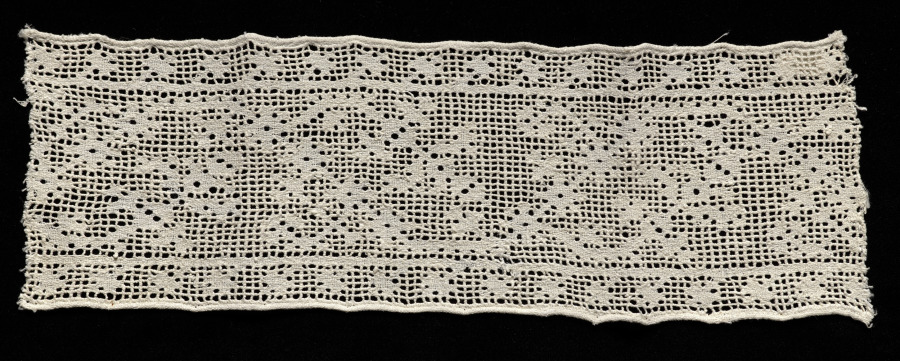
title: Band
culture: Italy, 1600s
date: 1600s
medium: Linen: needle lace (drawnwork)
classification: Lace